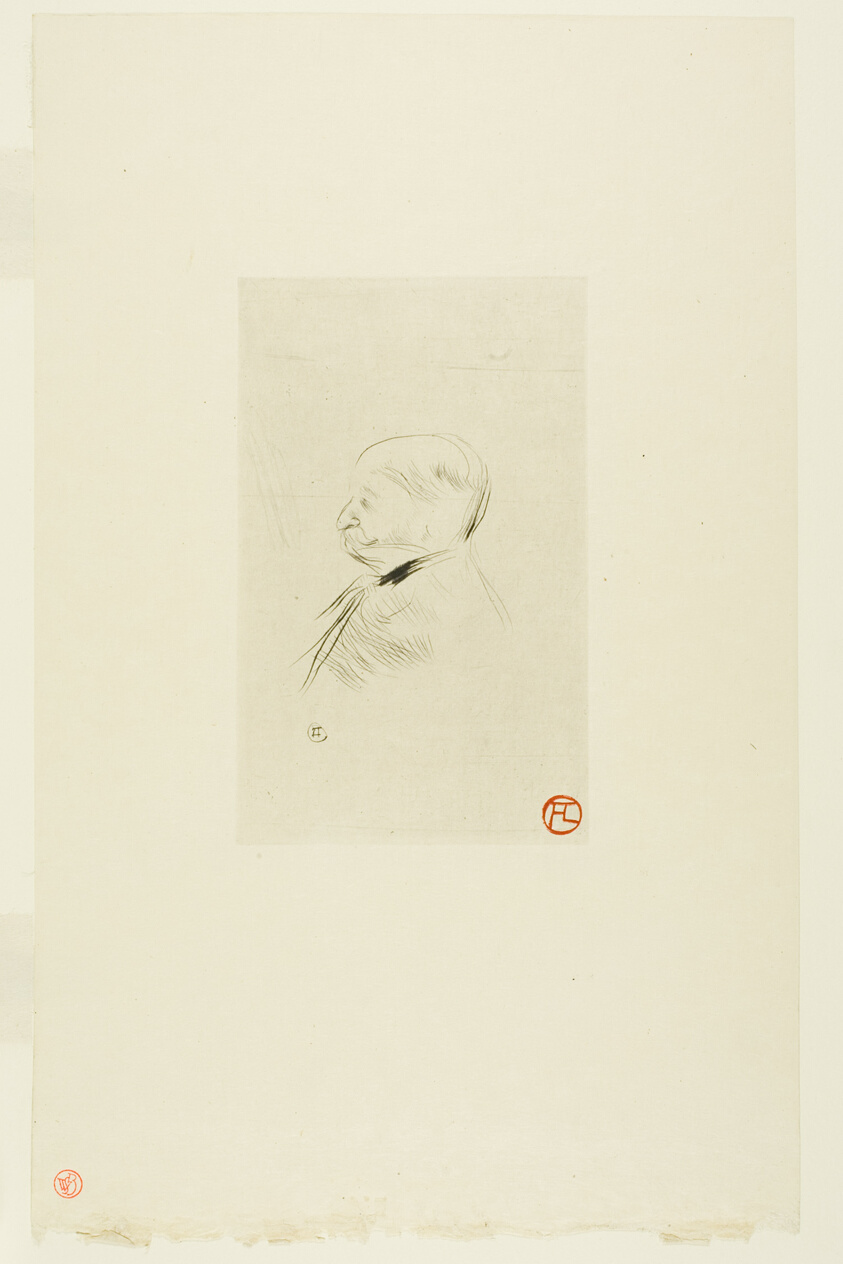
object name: Print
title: Portrait of a Man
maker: Henri de Toulouse-Lautrec (French, 1864-1901)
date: 1898, printed and published 1911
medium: Drypoint from a zinc plate on cream laid Japanese paper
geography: France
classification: drypoint; print; prints and drawing